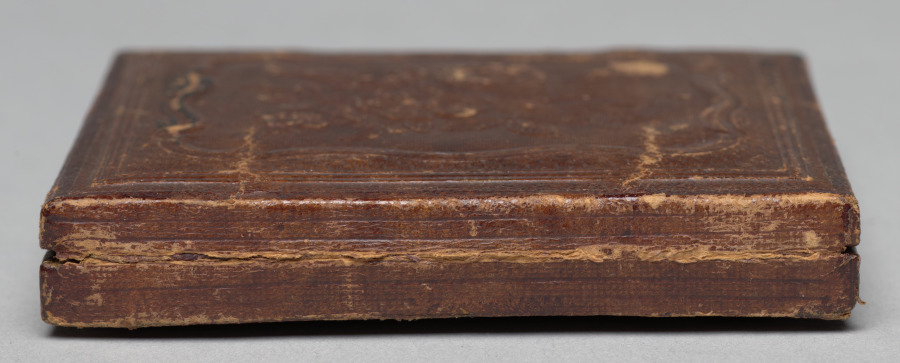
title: Standing boy with bottle curls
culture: America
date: c. 1853–54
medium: daguerreotype, sixth plate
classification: Photograph